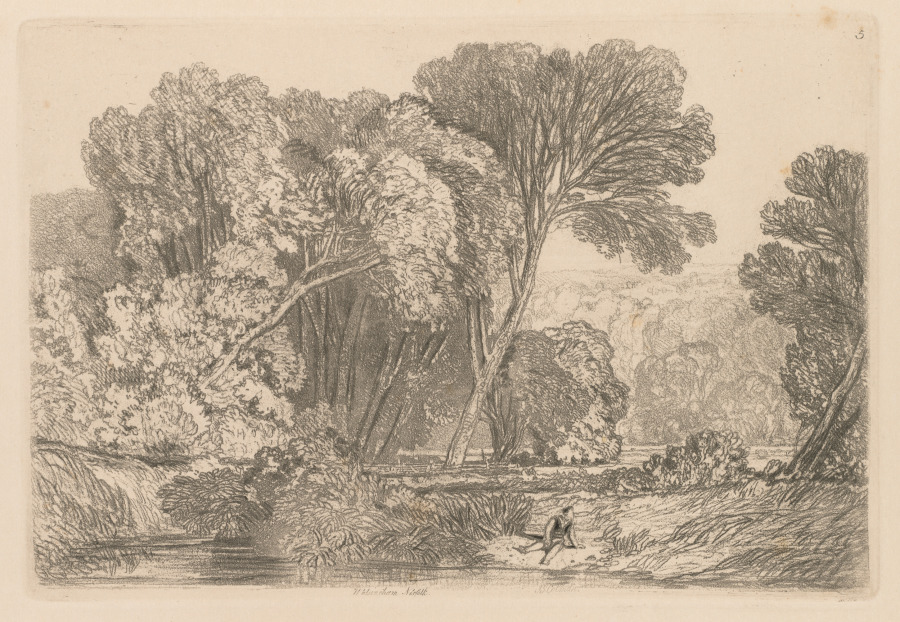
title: Liber Studiorum: Plate 5, Walsingham, Norfolk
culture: England, 19th century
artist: John Sell Cotman (British, 1782–1842)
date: 1838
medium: softground etching, from a bound volume containing 48 plates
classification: Bound Volume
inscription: In plate, within image, upper right: 5; in plate, below image: Walsingham, Norfolk